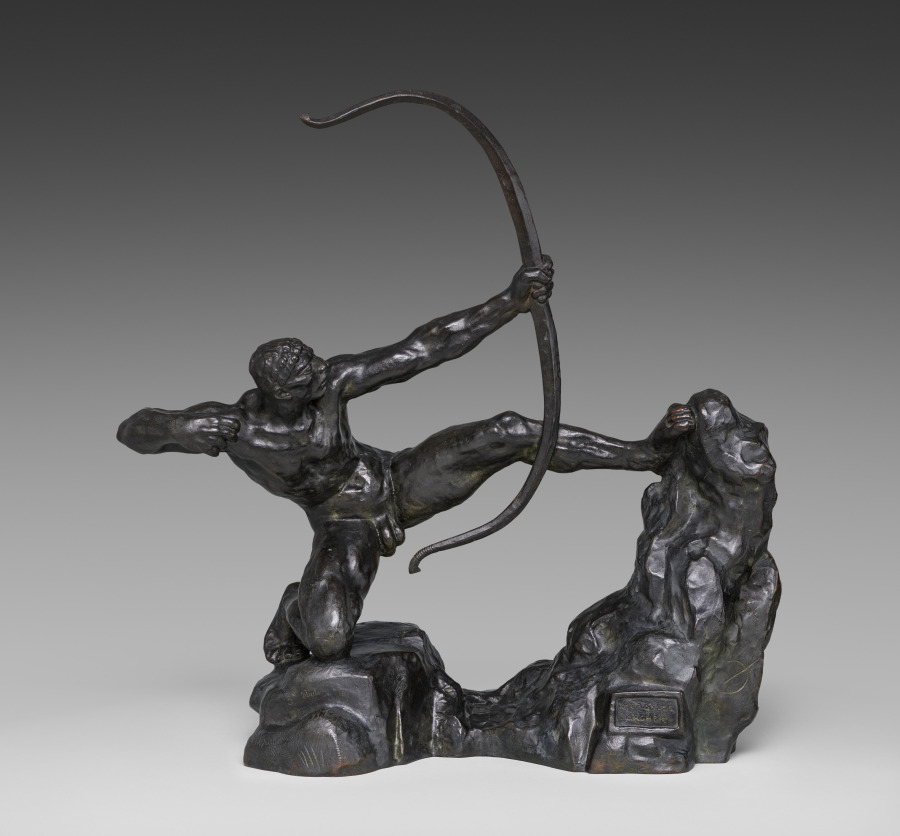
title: Herakles the Archer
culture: France, 19th century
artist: Emile Antoine Bourdelle (French, 1861–1929)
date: 1908–9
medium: bronze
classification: Sculpture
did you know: The model who posed for this sculpture was Major Paul Gustave André Doyen-Parigot, an accomplished sportsman and military commander, who was later killed during World War I in the Battle of Verdun.